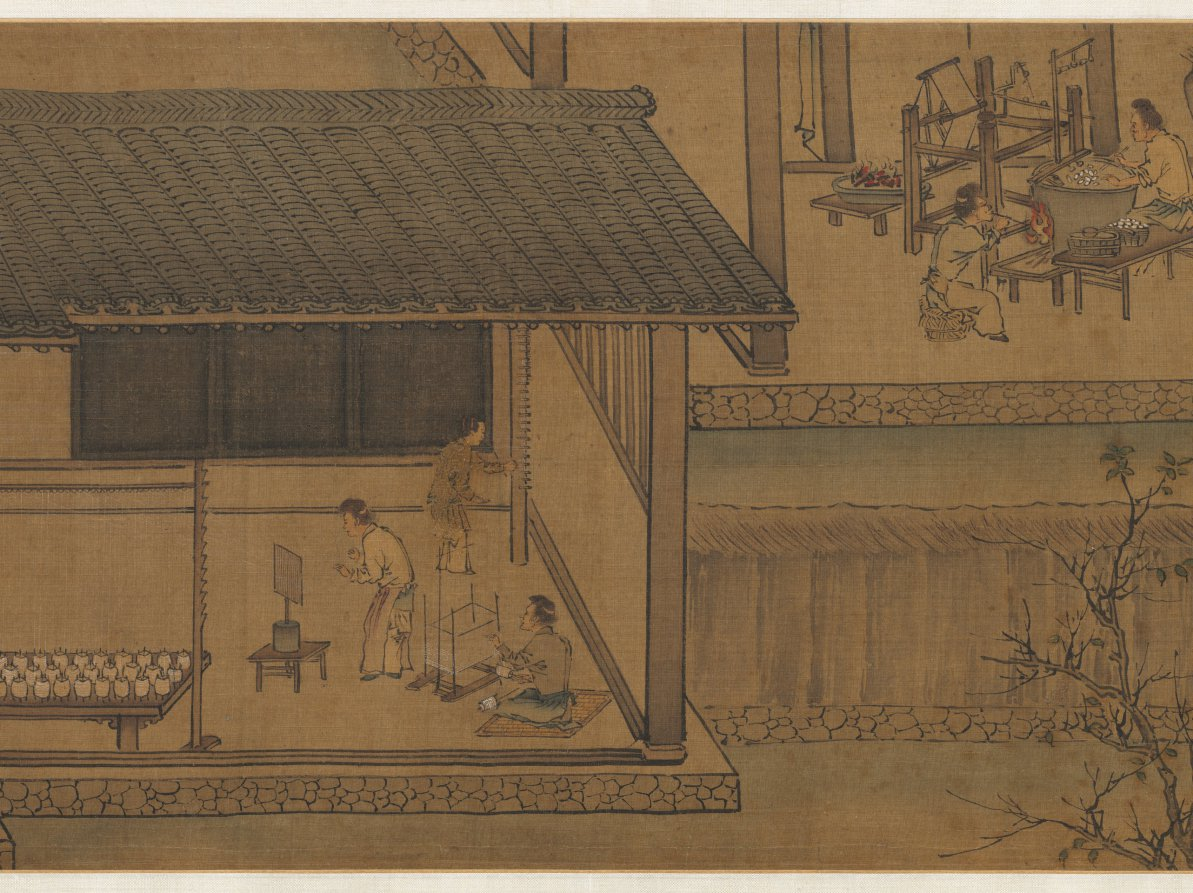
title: Sericulture (The Process of Making Silk)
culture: China, Southern Song dynasty (1127-1279)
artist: attributed to Liang Kai (Chinese, mid-1100s–early 1200s)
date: early 1200s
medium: Handscroll; ink and color on silk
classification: Painting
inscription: 3 colophons and 7 seals of Ch'eng Ch'i (20th c.).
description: By the Southern Song period, the economic center of the silk industry had shifted to the lower Yangzi delta, while the north continued to be troubled by wars. Divided into three sections, the handscroll illustrates 14 steps in the process of making silk, from the raising of silkworms to the weaving of silk cloth. The scroll’s scenes follow the illustrations of Lou Shou’s (1090–1162) Pictures of Tilling and Weaving (gengzhi tu), the first recorded painting of this genre, which was conceived in Hangzhou around 1145. However, in the Cleveland painting the artist groups several scenes of sericulture together under the roof of an open structure.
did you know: The painting is attributed to Liang Kai, a court artist active from about 1201 to 1204 at the Imperial Painting Academy in the city of Hangzhou, a major silk weaving center from that time to the present day.